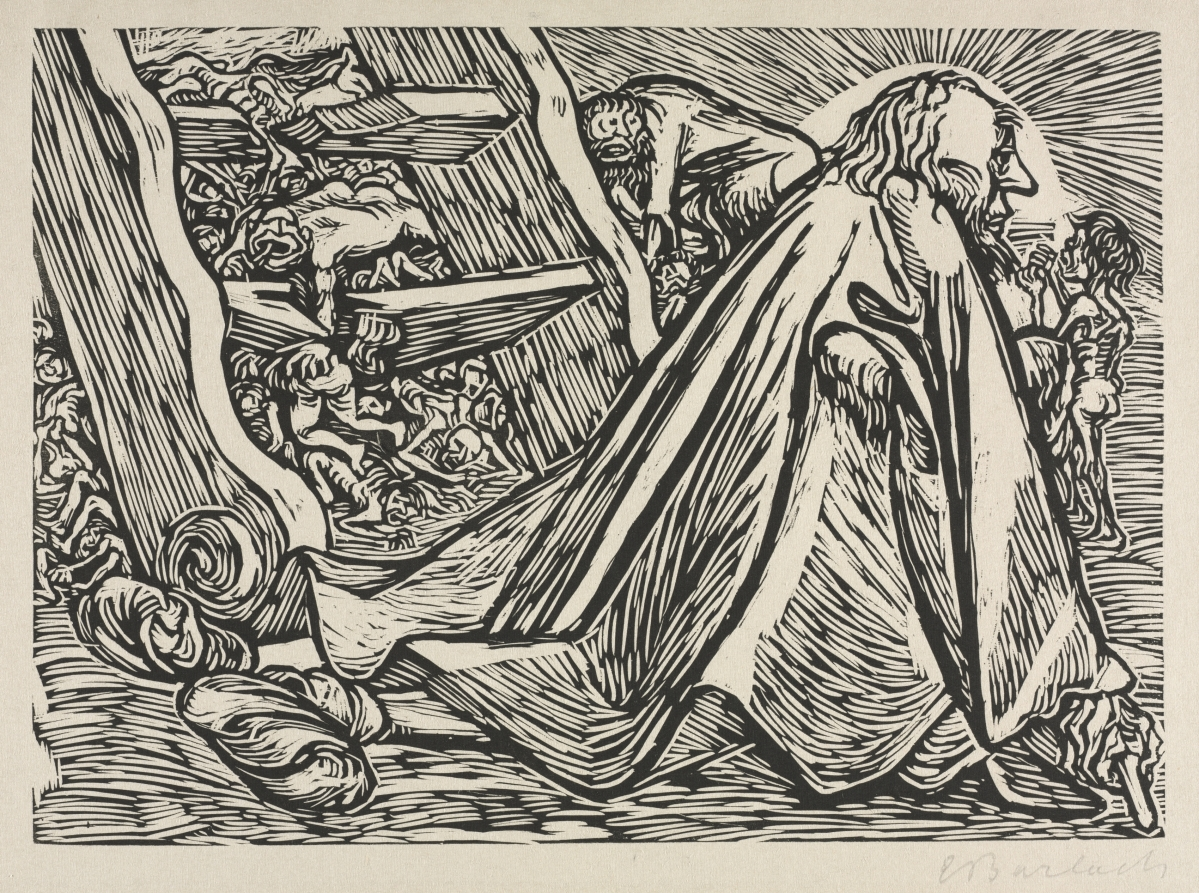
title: The Transformations of God: The Divine Beggar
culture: Germany, 20th century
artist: Ernst Barlach (German, 1870–1938)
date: 1921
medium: woodcut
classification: Print